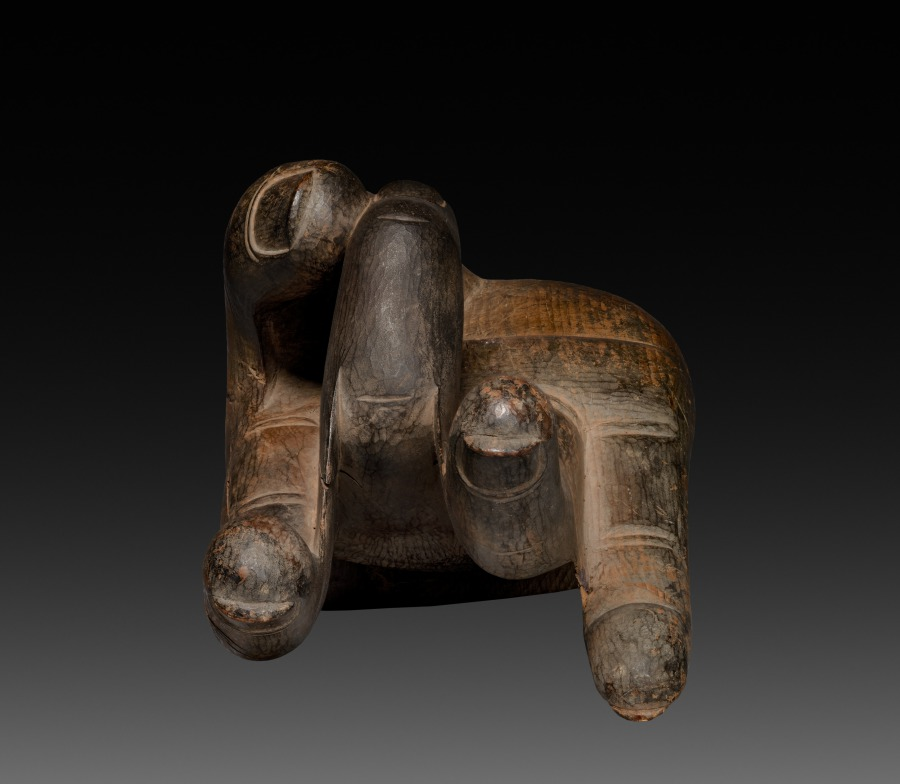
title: Hand of Buddha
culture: Japan, Nara period (710–94)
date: late 700s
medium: wood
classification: Sculpture